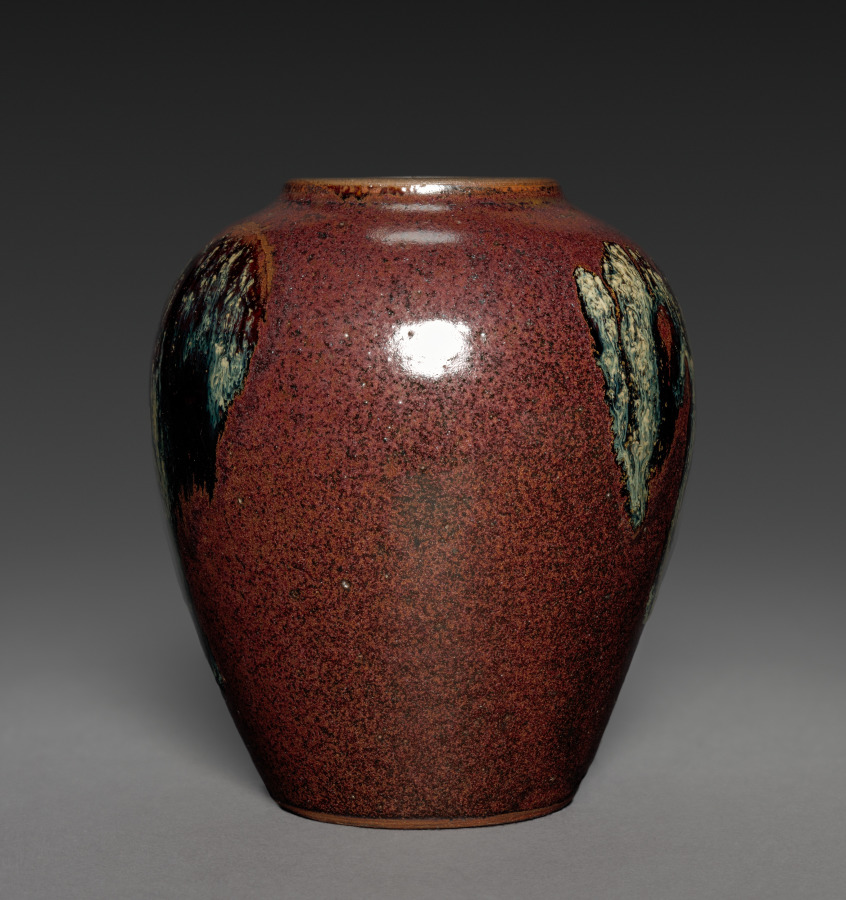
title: Inverted Pear-Shaped Jar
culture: Japan, Edo period (1615–1868)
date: 1800s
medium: pottery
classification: Ceramic